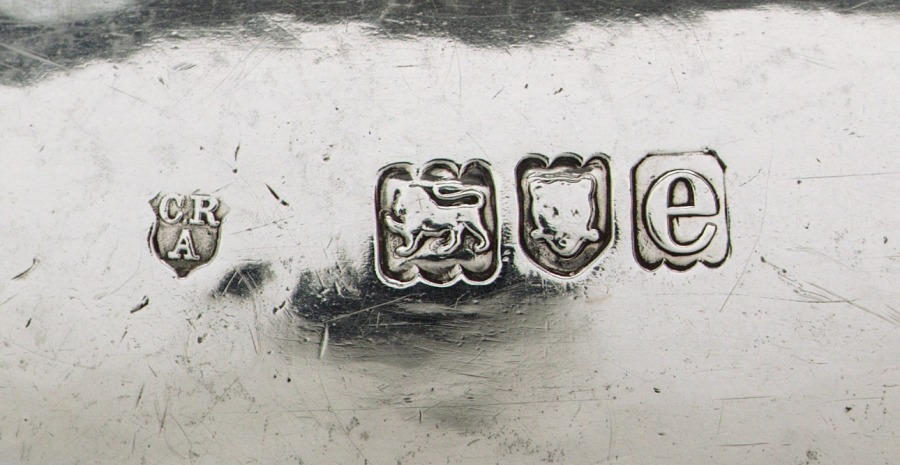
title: Kettle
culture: England, late 19th-early 20th Century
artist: Charles Robert Ashbee (British, 1863–1942)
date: 1900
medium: silver with ivory handle and chrysoprase finial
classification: Silver